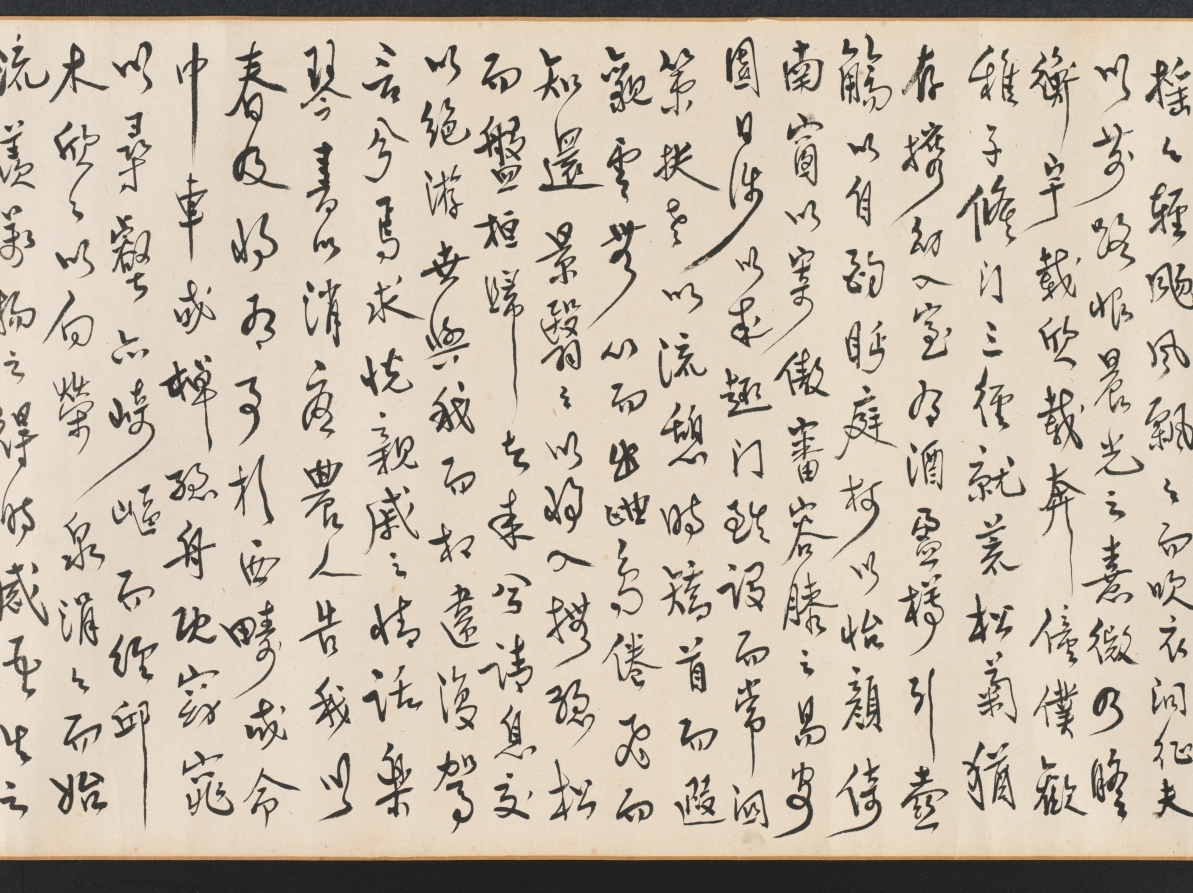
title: Tao Yuanming's Return Home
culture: China, Yuan dynasty (1271-1368)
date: 1300s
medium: Handscroll; ink and slight color on silk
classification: Painting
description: Tao Yuanming's revered poem "Return Home 歸去來辭 (Gui qu lai ci)" powerfully conveys his desire to leave bureaucratic life for the simplicity and authenticity of nature. This sentiment has deeply resonated with generations of Chinese scholars, making it a popular theme in paintings. This handscroll uses continuous narrative depicting Tao in multiple scenes from the poem. Starting on the right, the poet travels to his home. His children wait by the gate, while his wife pauses to tidy her hair before welcoming him. Then, free from the burdens of official service, Tao spends time in both nature and his cottage, where he can again enjoy wine, music, and books.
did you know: Poet Tao Yuanming 陶淵明 (c. 365–427 CE) returned to a secluded life instead of pursuing a civil service career.